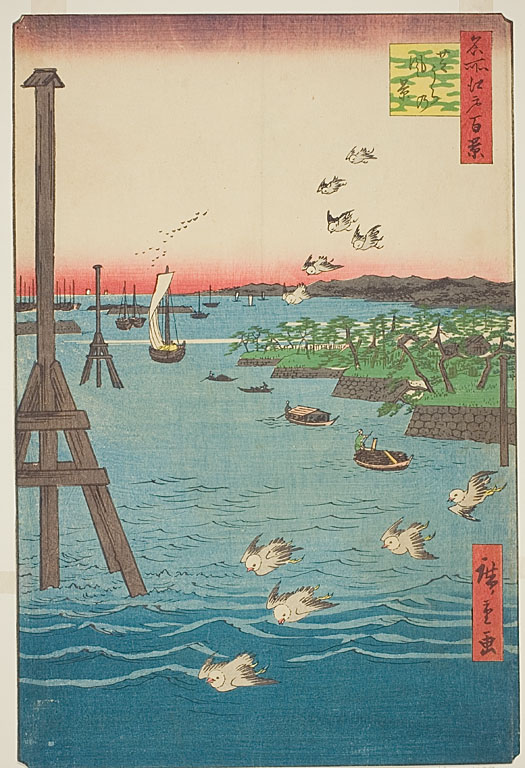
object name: Print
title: View of Shiba Coast (Shibaura no kei), with shades of light blue water, No.108 from the series One Hundred Famous Views of Edo (Meisho Edo hyakkei)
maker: Utagawa Hiroshige (Japanese, 1797-1858)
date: 1856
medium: Color woodblock print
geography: Japan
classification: woodblock print; print; asian art